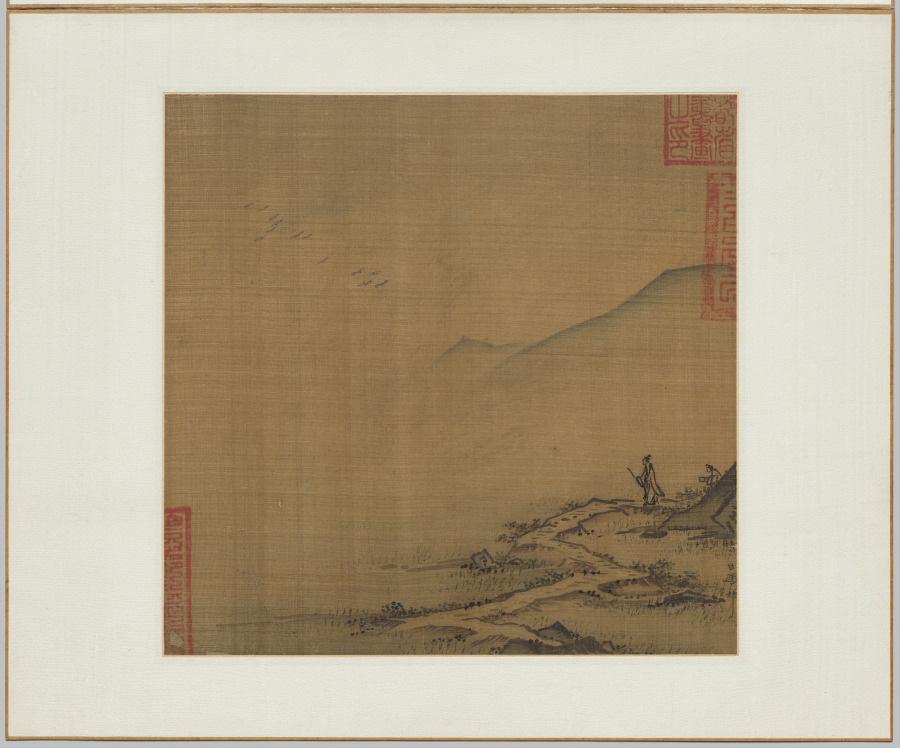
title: Landscape with Flying Geese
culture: China, Southern Song dynasty (1127-1279)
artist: Ma Lin (Chinese, c. 1185–after 1260)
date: mid-1200s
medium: Album leaf; ink and slight color on silk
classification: Painting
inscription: 臣馬麟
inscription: 3 half-seals: 1 official seal of Yuan Dynasty; 1 of Ming imperial collection (used 1372-84); 1 official seal of Ming Dynasty.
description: This minimalist landscape places most of the representational elements in the lower right foreground. A lone gentleman strolls along a zigzagging path by the water. With the gentleman’s staff acting as a visual cue, the viewer’s gaze is directed to geese flying over distant mountains. The scene of a marshland, with its wet and soft ground dotted with vegetation, suggests springtime in Jiangnan. Combined with the flying geese, the album evokes the poetic lines: By spring fields, geese are about to return, Under chilly waters, fish are submerging. 春郊欲回雁, 寒水正沉鱼